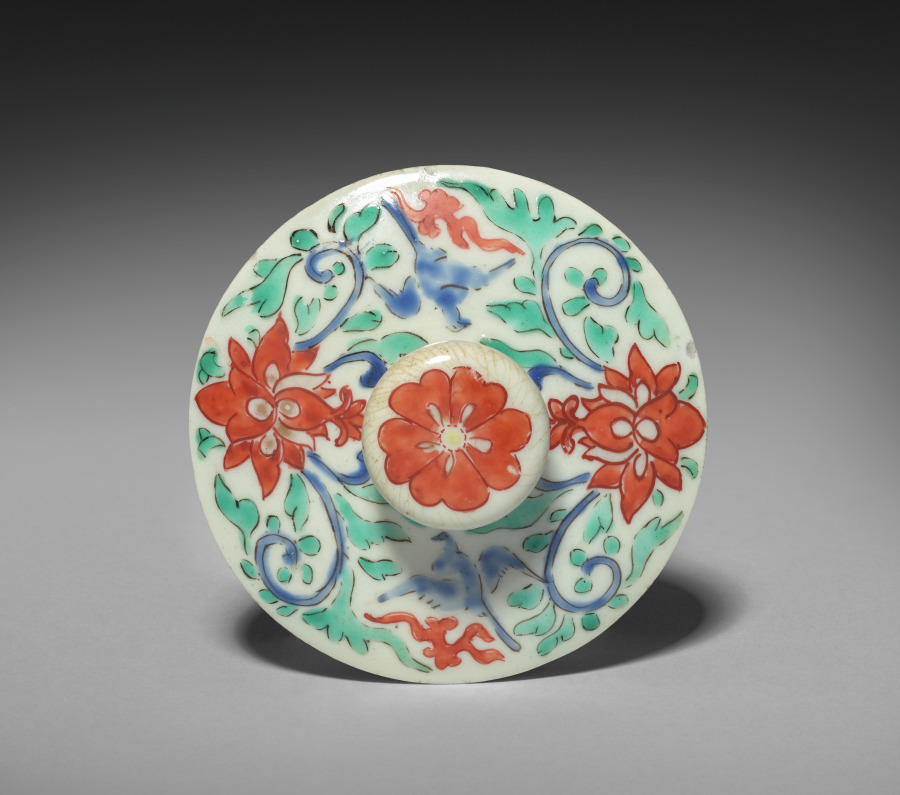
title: Square Jar with Birds and Flowers (lid)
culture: Japan, Edo period (1615–1868)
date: late 1600s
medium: Porcelain with overglaze color enamels and gold (Hizen ware, Kakiemon type)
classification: Ceramic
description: This lidded square jar was likely paired with a complementary yet nonidentical mate. The pine tree, plum, and bamboo together form the frequently depicted motif known as the Three Friends of Winter (shōchikubai), so named because of their hardy perseverance in the cold. Each side also features a pair of birds, including cranes on one face and pheasants on another.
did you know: A jar like this was fired at a high temperature, painted with colored enamels, and then fired again at a lower temperature.